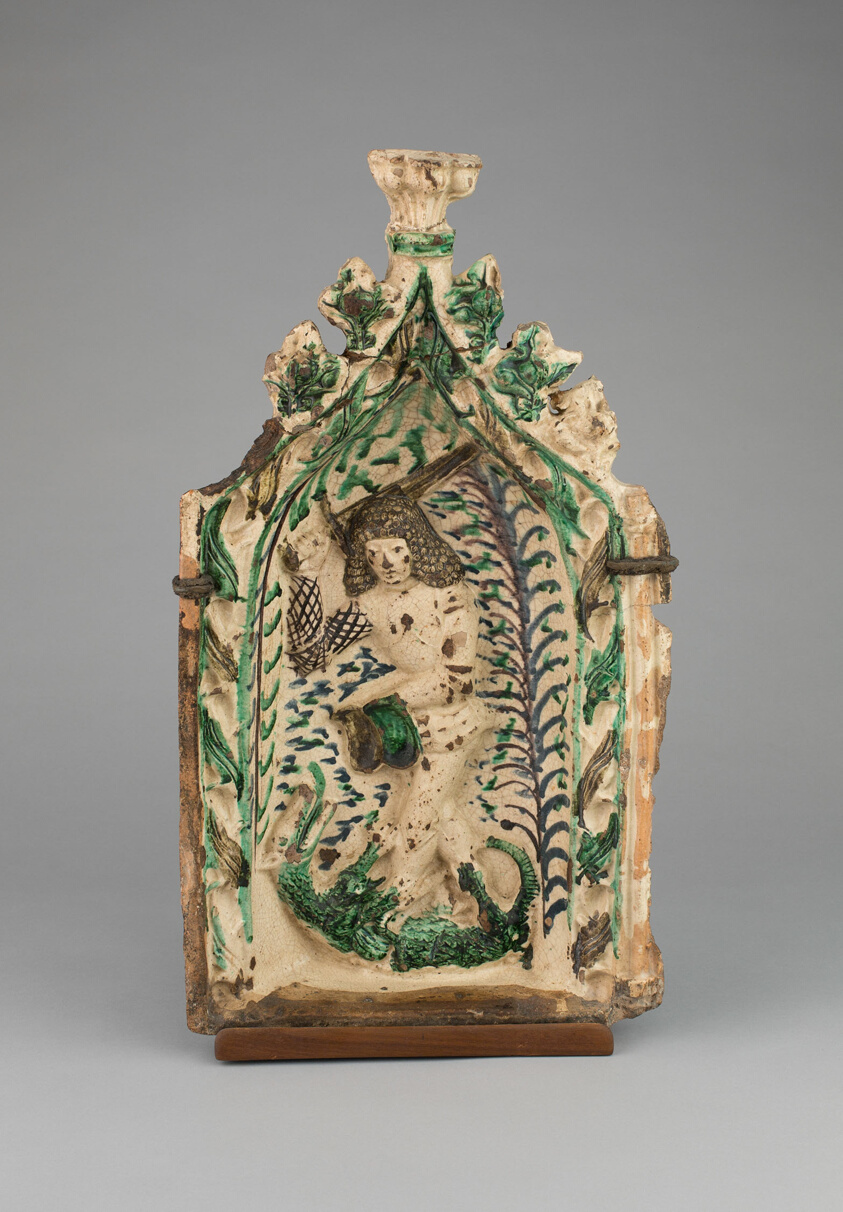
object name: Ceramics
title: Stove Tile with Saint George and the Dragon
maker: Austrian or south German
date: 1475/1500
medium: Lead-glazed earthenware with colored glazes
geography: Germany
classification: earthenware; ceramics; european decorative arts; decorative arts